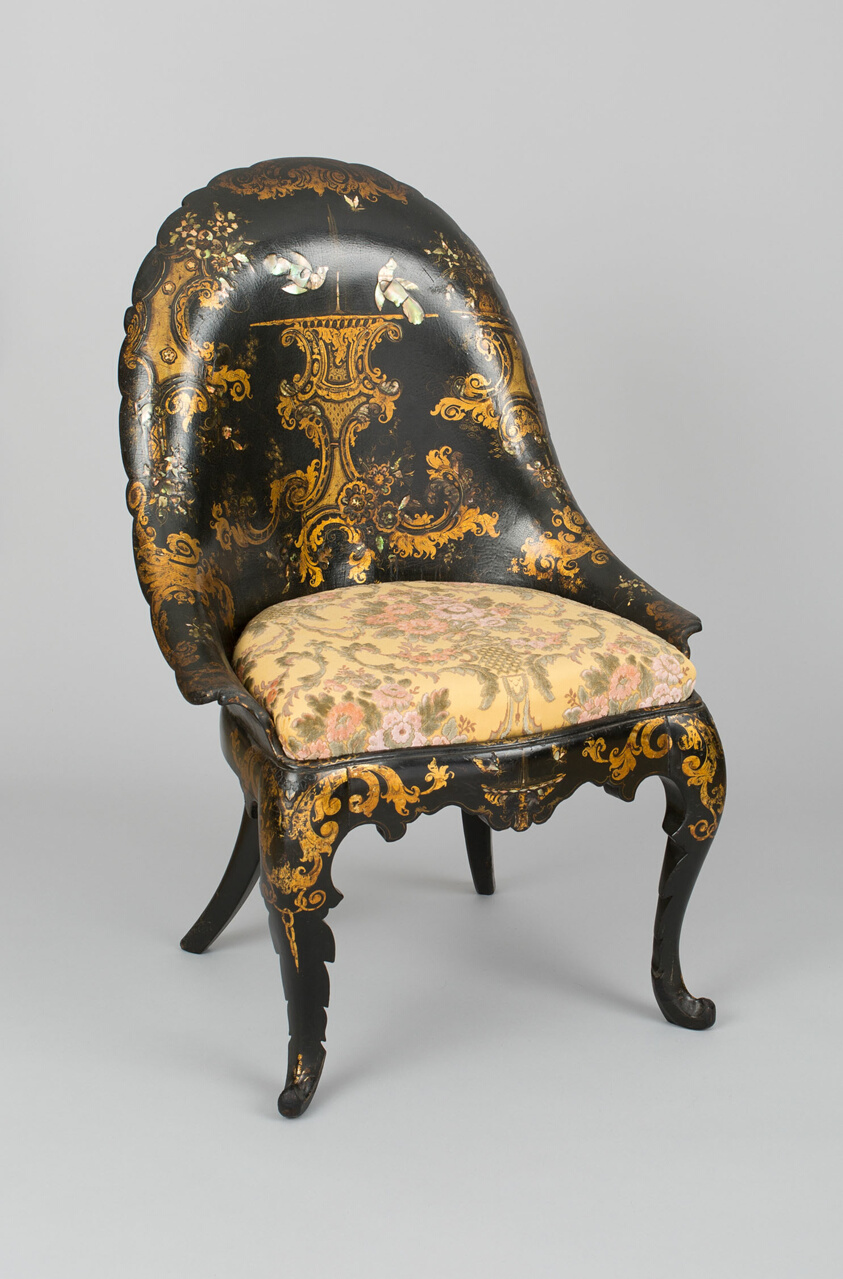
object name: Furniture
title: Pair of Chairs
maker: Jennens and Bettridge (Birmingham and London, England, 1815-1864)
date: 1844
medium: Papier-mâché, wood, gilded and inlaid with mother-of-pearl; modern upholstery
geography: Birmingham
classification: chair; seating; furniture; european decorative arts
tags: furniture